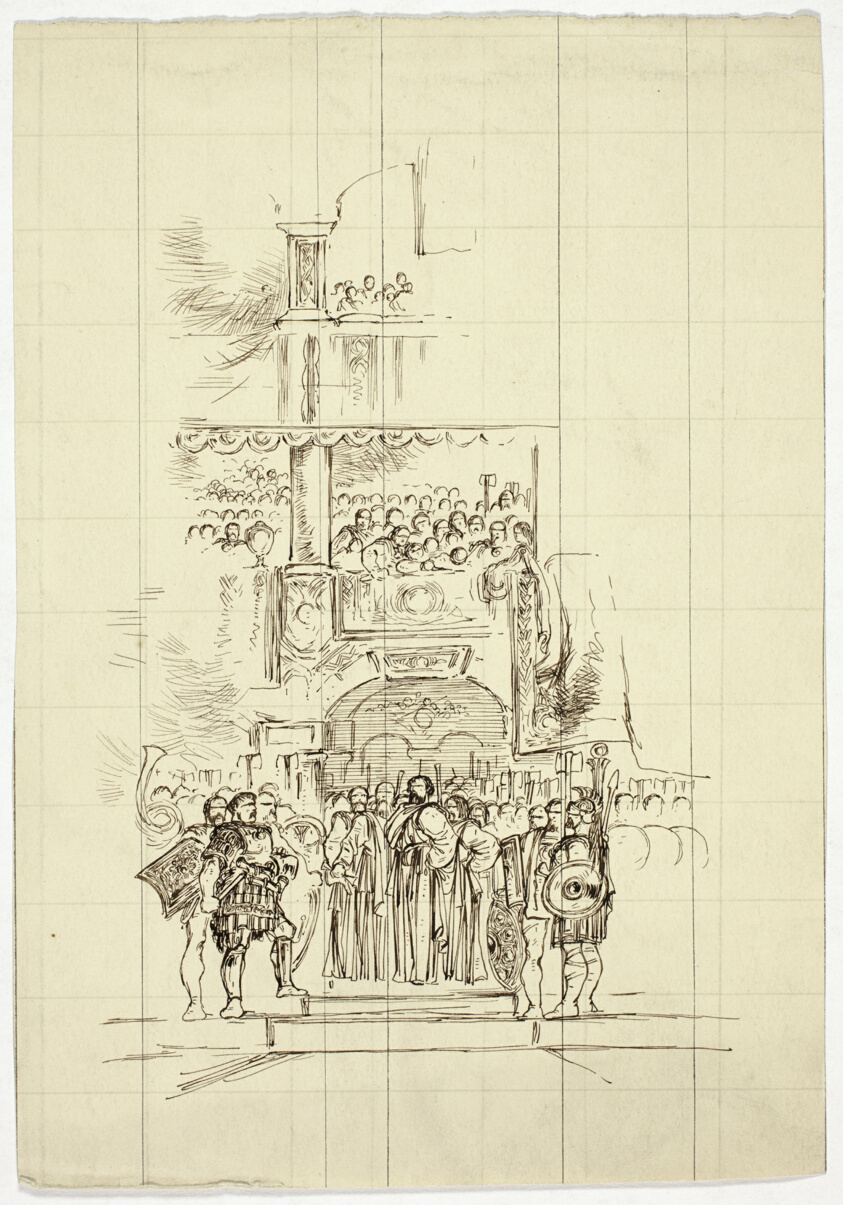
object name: Drawing and Watercolor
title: Assembly on Steps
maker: Unknown Artist; French or British, 19th century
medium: Pen and brown ink, over pen and ink, on cream wove paper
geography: France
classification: pen and ink drawings; drawings (visual works); prints and drawing